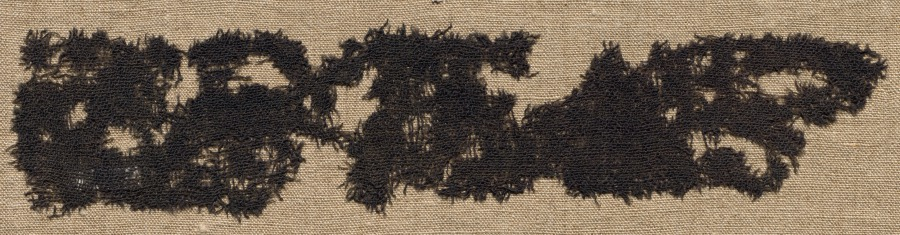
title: Crepe/Rep Cloth Fragment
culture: Syria, Dura-Europos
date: 200s CE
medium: wool: tabby, crepe/rep cloth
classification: Textile